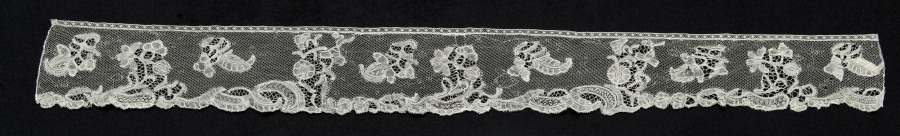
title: Lace Edging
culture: Belgium, Brussels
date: 1700s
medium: Linen: bobbin lace (Point d'Angleterre)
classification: Lace